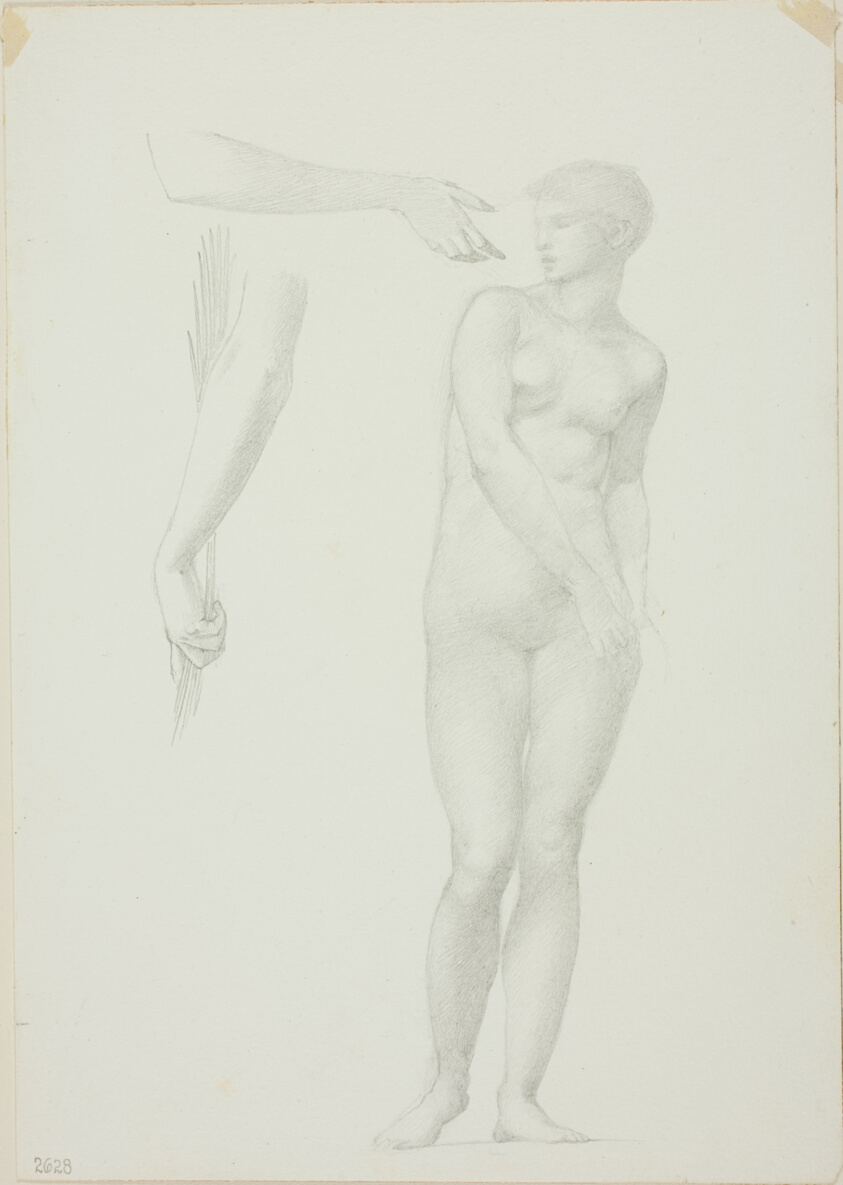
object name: Drawing and Watercolor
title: Standing Female Nude and Sketches of Arms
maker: Sir Edward Burne-Jones (English, 1833-1898)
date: c. 1873–77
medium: Graphite on ivory wove paper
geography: England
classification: graphite; drawings (visual works); prints and drawing